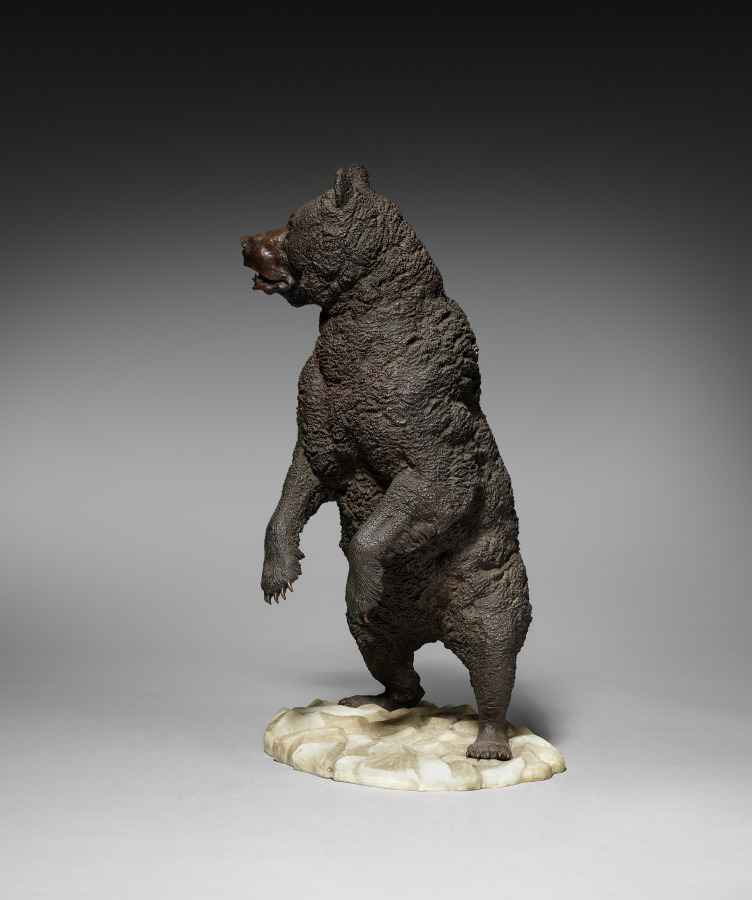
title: Bear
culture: Japan, Meiji period (1868–1912) to Shōwa period (1926–89)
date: c. 1900–1947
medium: bronze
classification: Sculpture